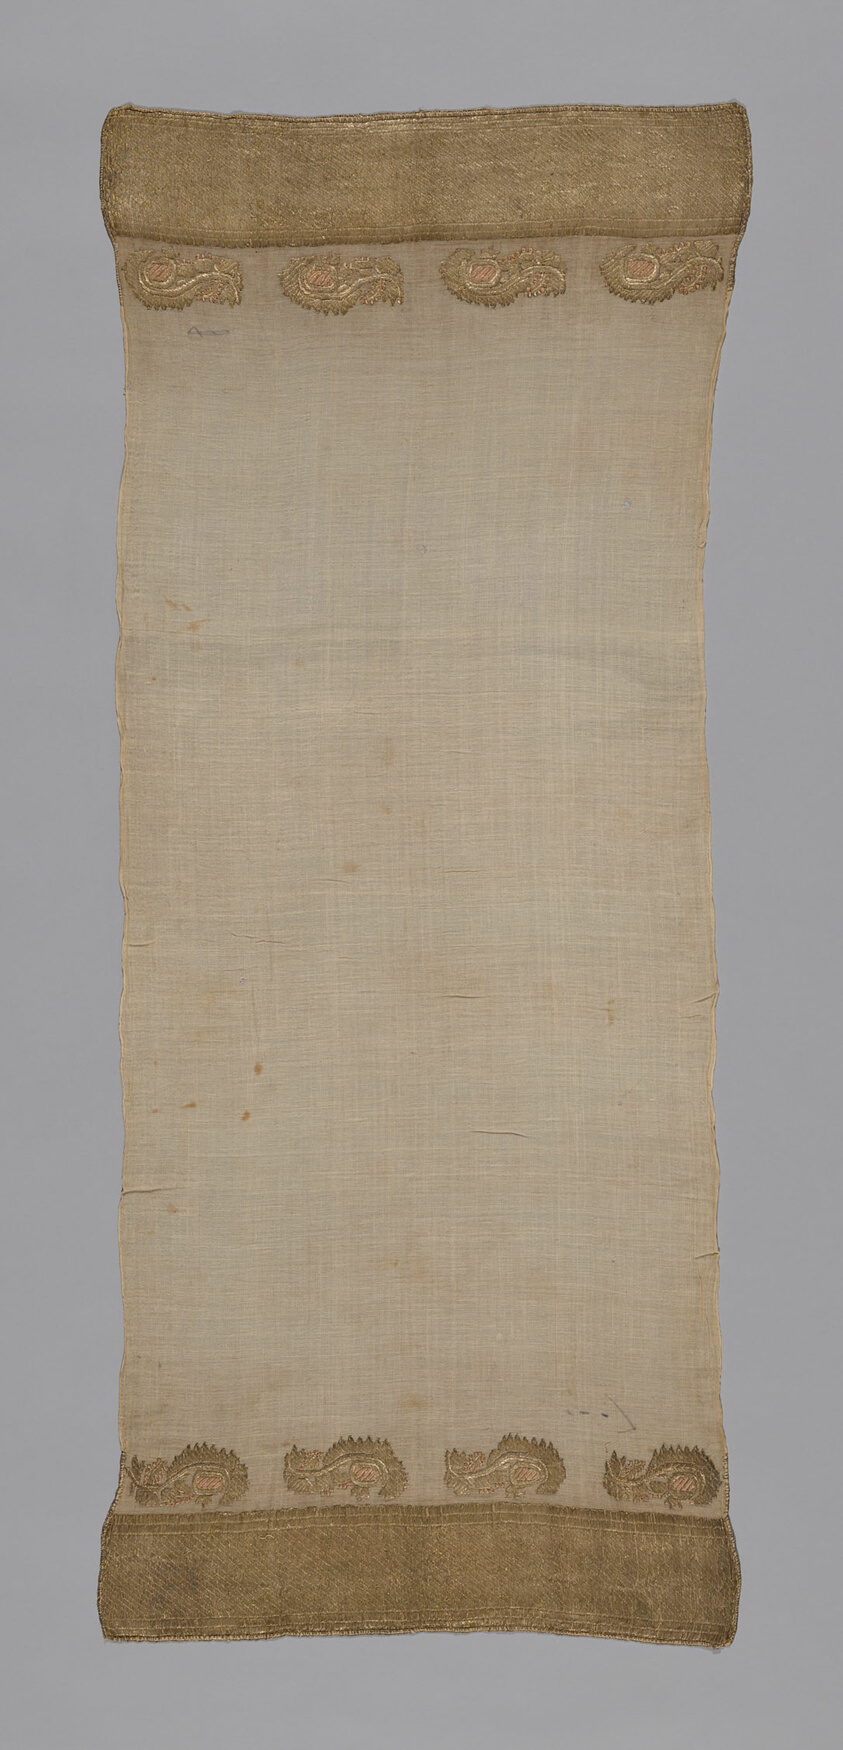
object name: Textile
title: Towel or Napkin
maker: Turkey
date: 1875/1900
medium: embroidered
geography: Turkey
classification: textile; weaving; needlework (visual works)